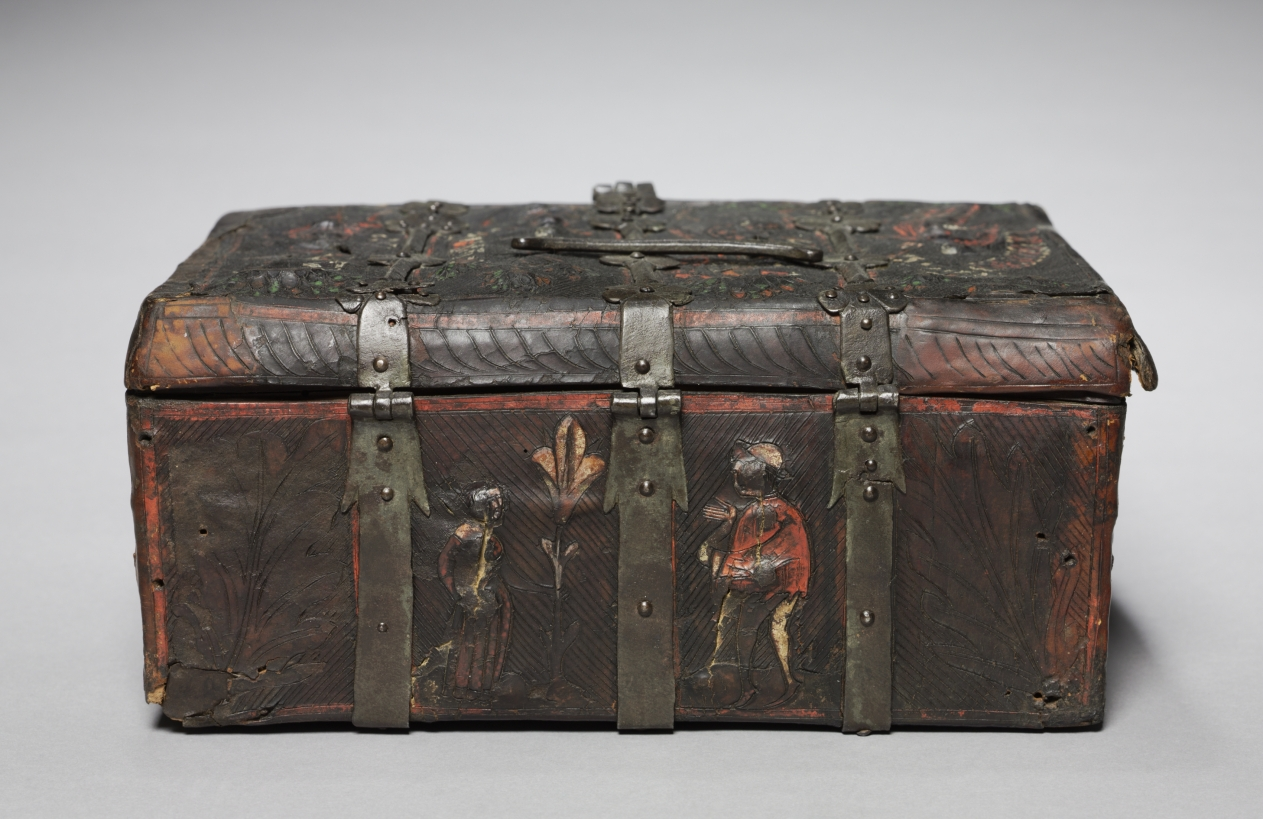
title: Leather Casket with Scenes of Courtly Love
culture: France, Gothic period, 2nd half of the 14th century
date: c. 1350–1400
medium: Leather: embossed, incised; iron mounts; wood core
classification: Leather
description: During the Middle Ages, small boxes like this were produced for the secular market. Used for storing personal items, the boxes typically consisted of a wood core that might be decoratively painted and gilded or covered with another material, such as ivory or leather. Manufactured in small, highly specialized leather workshops, these richly embellished caskets were valued furnishings in the homes of the aristocratic clientele that commissioned them. On the lid of this box, a couple is shown with banderoles inscribed in Old French with expressions of mutual love. "Hold my heart," requests the lady. "But you already have it," replies the man. On the front of the casket, the man, holding a heart, appears again and states, "Have it once more."